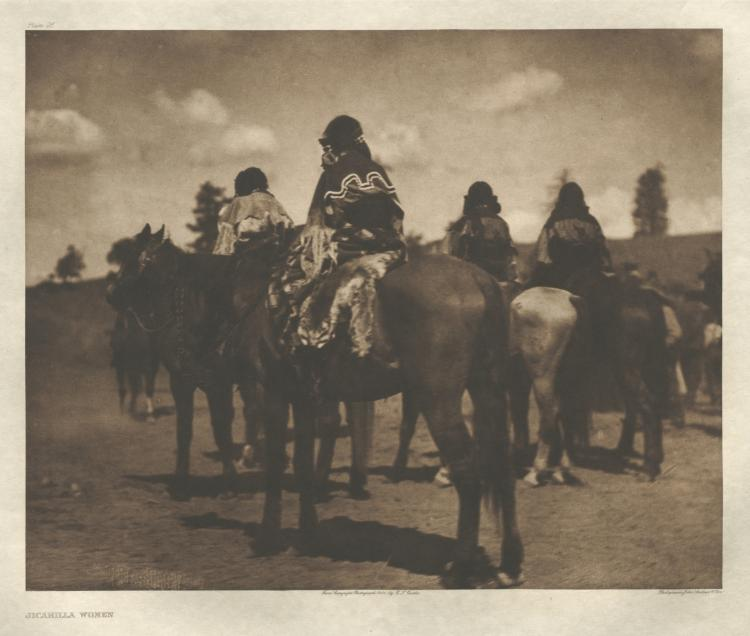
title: Portfolio I, Plate 25: Jicarilla Women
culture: America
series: The North American Indian: being a series of Portfolios picturing and describing the Indians of the United States, the Dominion of Canada, and Alaska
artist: Edward S. Curtis (American, 1868–1952)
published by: The University Press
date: 1904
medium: photogravure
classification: Portfolio